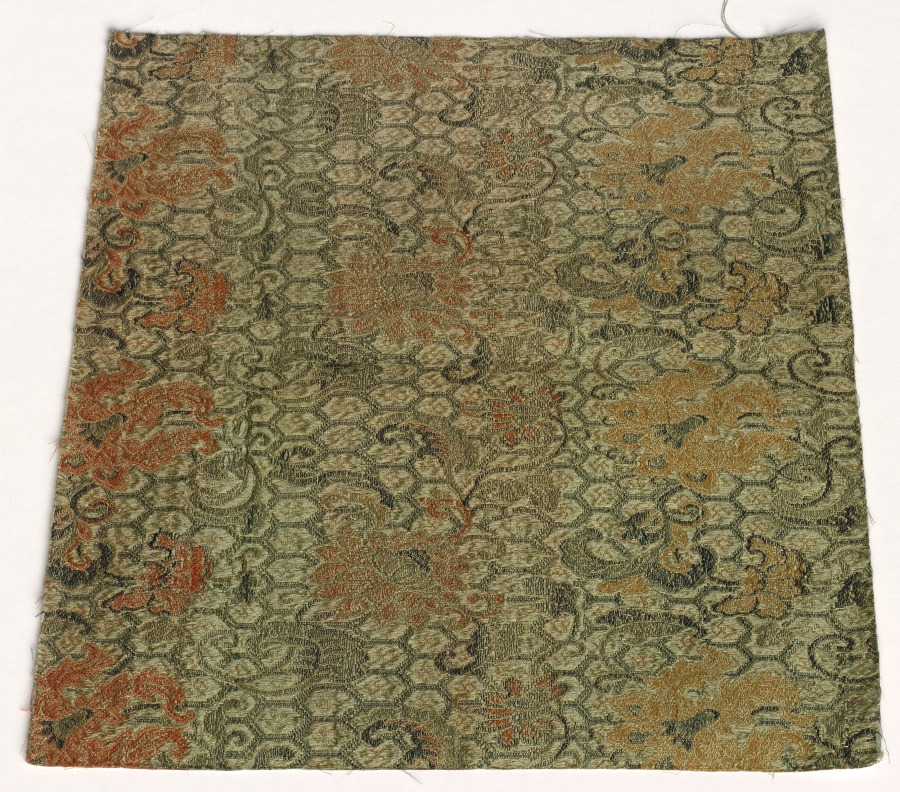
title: Fragment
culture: China, 19th century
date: 1800s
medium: silk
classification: Textile